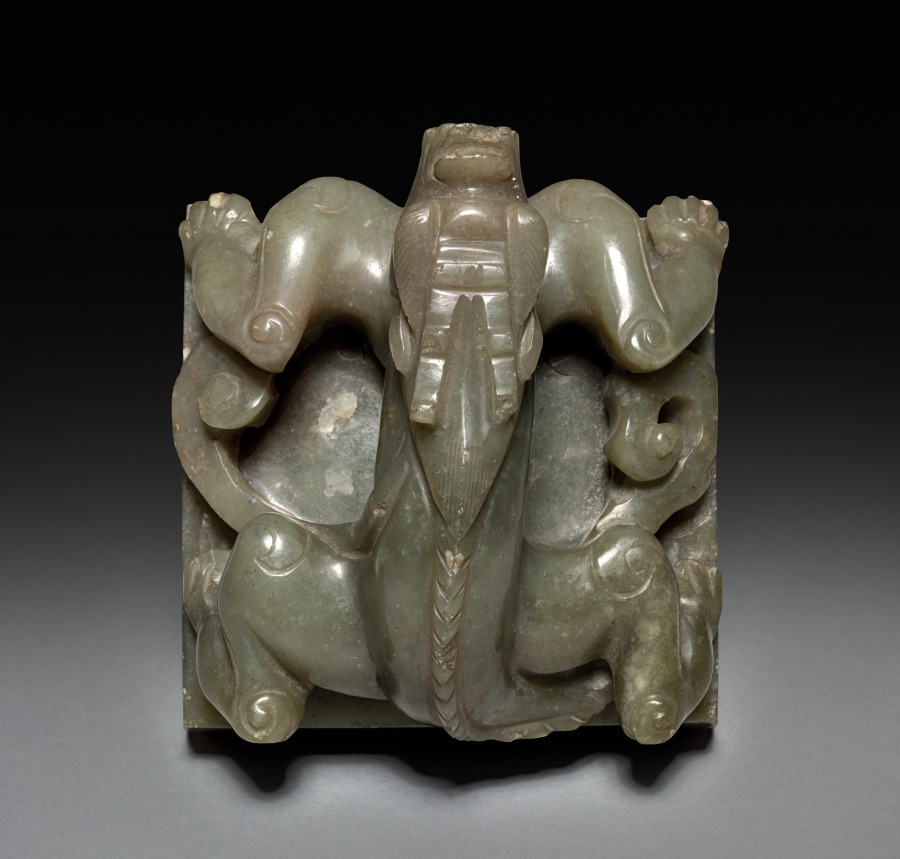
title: Seal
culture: China, Qing dynasty (1644-1911)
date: 1700 or later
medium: Jade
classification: Jade